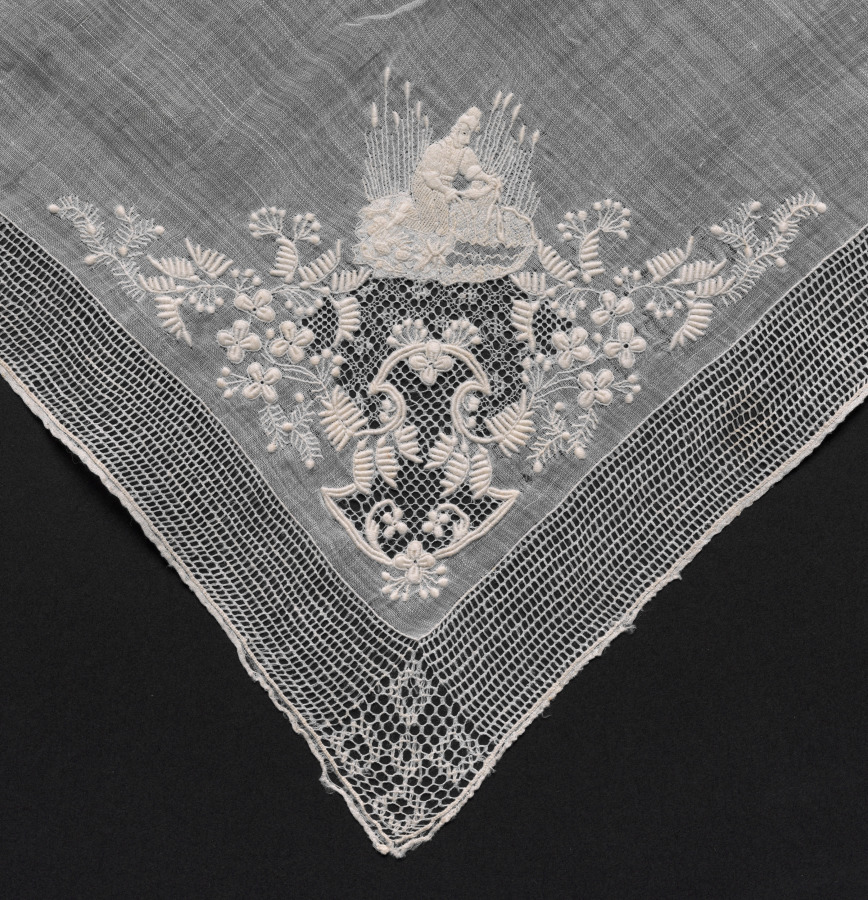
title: Embroidered Handkerchief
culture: Italy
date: 1700s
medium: Plain weave linen with needle lace (drawnwork) and embroidery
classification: Embroidery